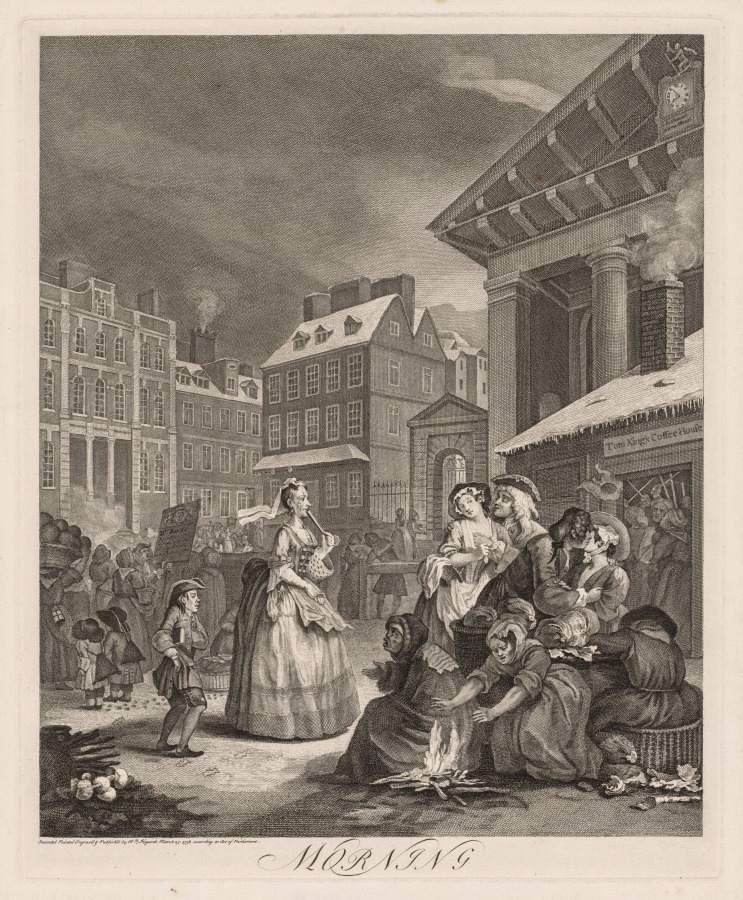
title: The Four Times of Day: Morning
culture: England, 18th century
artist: William Hogarth (British, 1697–1764)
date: 1738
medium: engraving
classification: Print